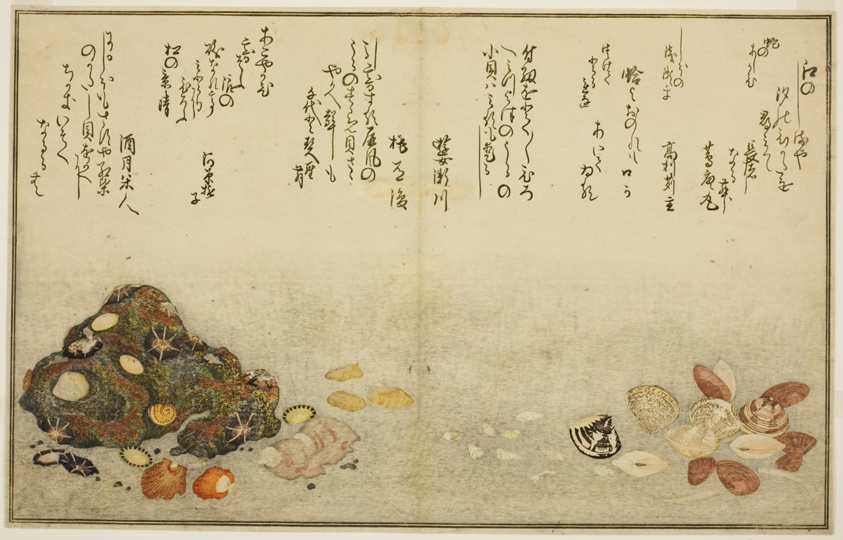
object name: Print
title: Ashi-gai, hamaguri, ko-gai, suzume-gai, akoya-gai, and katashi-gai, from the illustrated book "Gifts from the Ebb Tide (Shiohi no tsuto)"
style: Japanese (culture or style)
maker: Kitagawa Utamaro 喜多川 歌麿; Japanese, 1753 (?)-1806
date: 1789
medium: Color woodblock print; double-page illustration from book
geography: Japan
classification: woodblock print; print; asian art